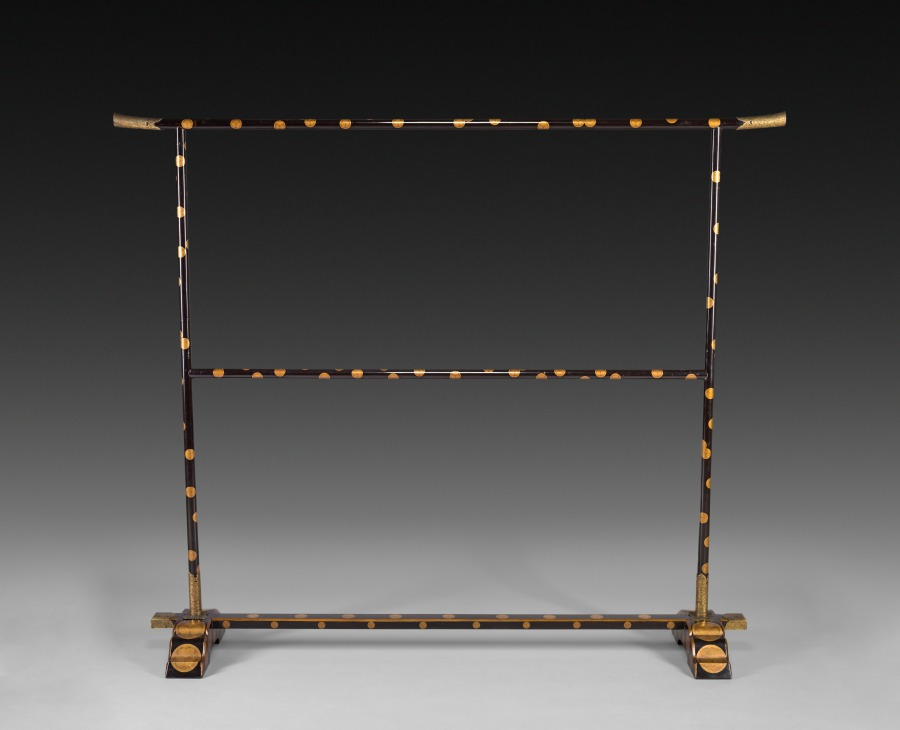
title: Rack for Noh Robe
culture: Japan, Edo period (1615–1868)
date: 1615–1868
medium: lacquer on wood with metal fittings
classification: Lacquer